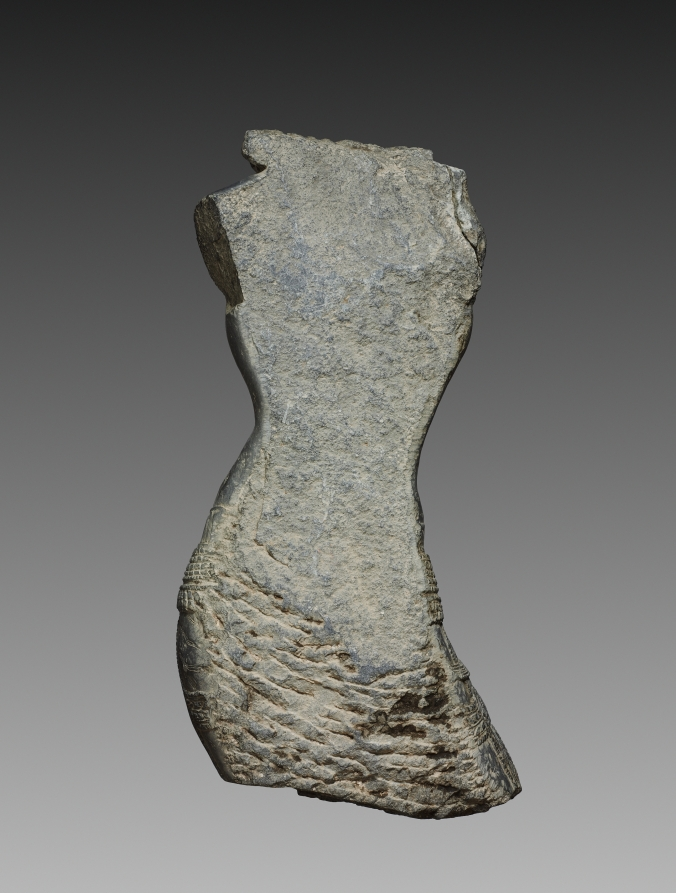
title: Female torso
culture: Northeastern India, Pala dynasty (730-1197)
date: 1000s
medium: black chlorite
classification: Sculpture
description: This life-size sculpture of a female figure was likely installed by a doorway or in an exterior niche of a Buddhist temple. Throughout the history of Indian art, voluptuous female figures have adorned Buddhist sanctuaries. Embodying the Indian ideal of female beauty, the form of the young mother with full breasts of milk personifies abundance, nourishment, and productivity—ideas that were considered auspicious and life affirming. Her copious jewels and valuable textiles also visually relate that the good karmic actions of venerating the Buddha and following his teachings will result in abundant good fortune.